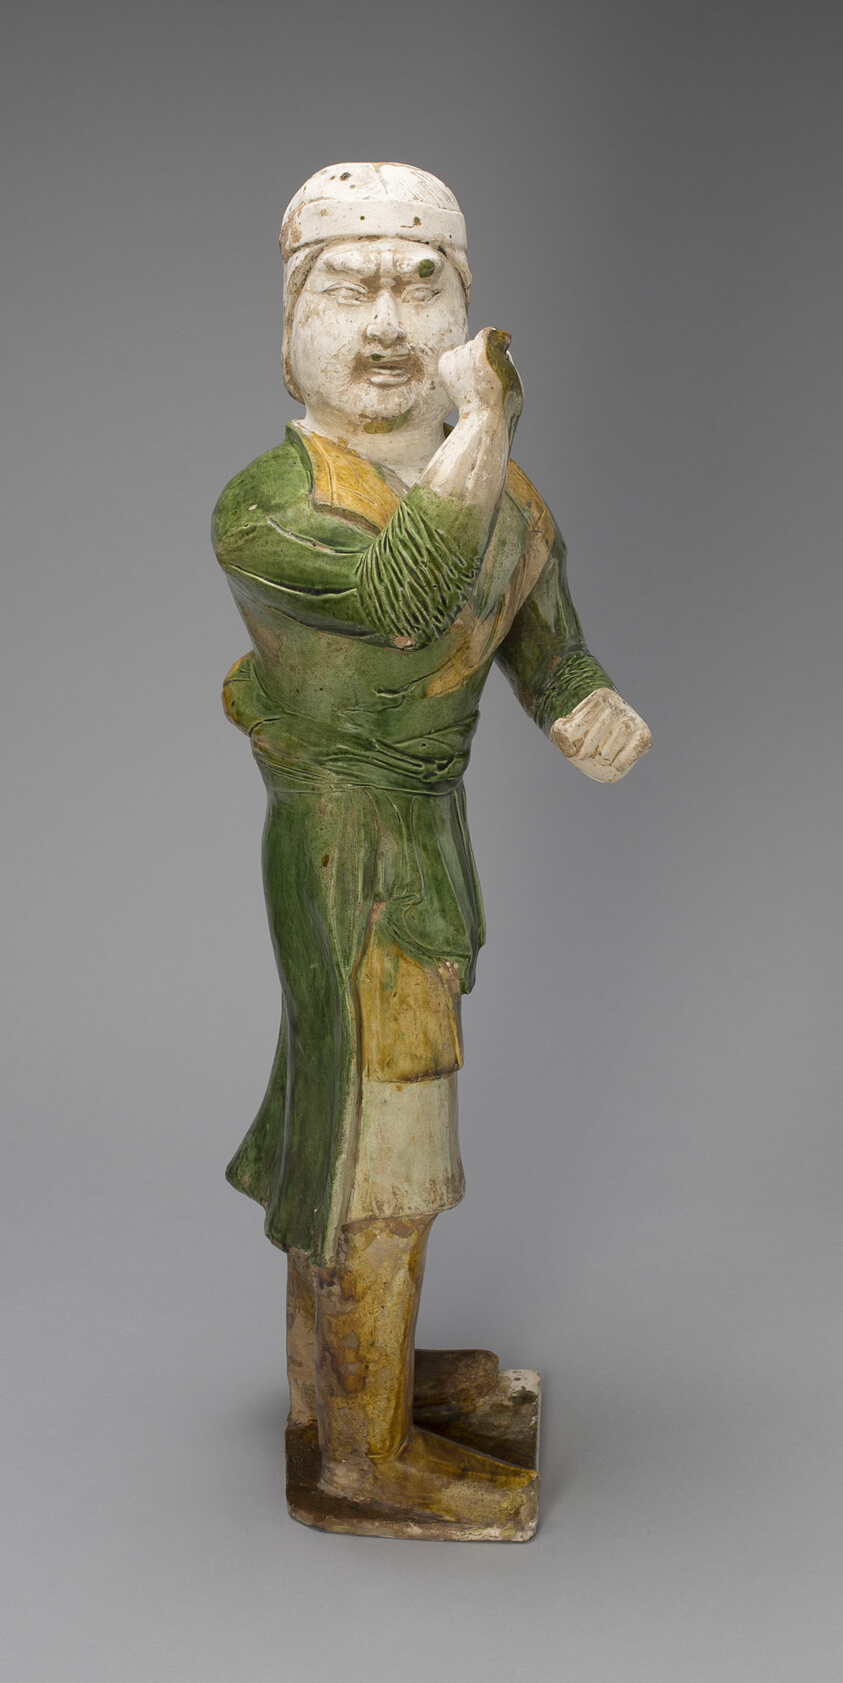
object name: Sculpture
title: Groom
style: Chinese (culture or style)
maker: China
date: Tang dynasty (618–907), first half of 8th century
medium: Earthenware with three-color (sancai) lead glazes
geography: China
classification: earthenware; ceramics; asian art; sculpture